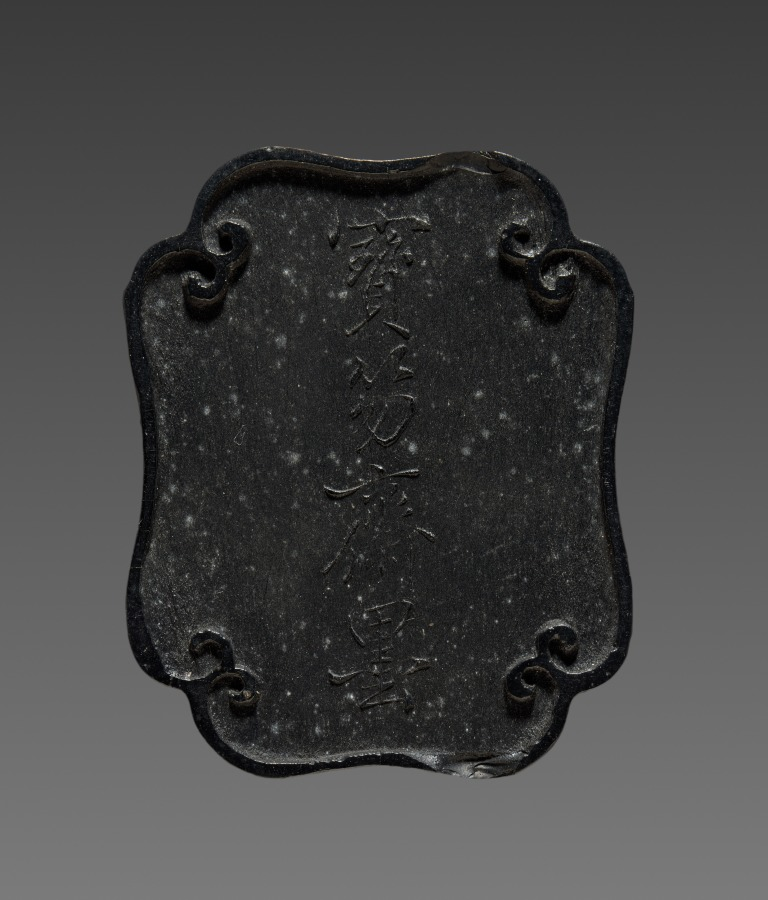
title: Ink Cake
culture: China, Qing dynasty (1644-1911)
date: 19th Century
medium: ink cake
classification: Miscellaneous